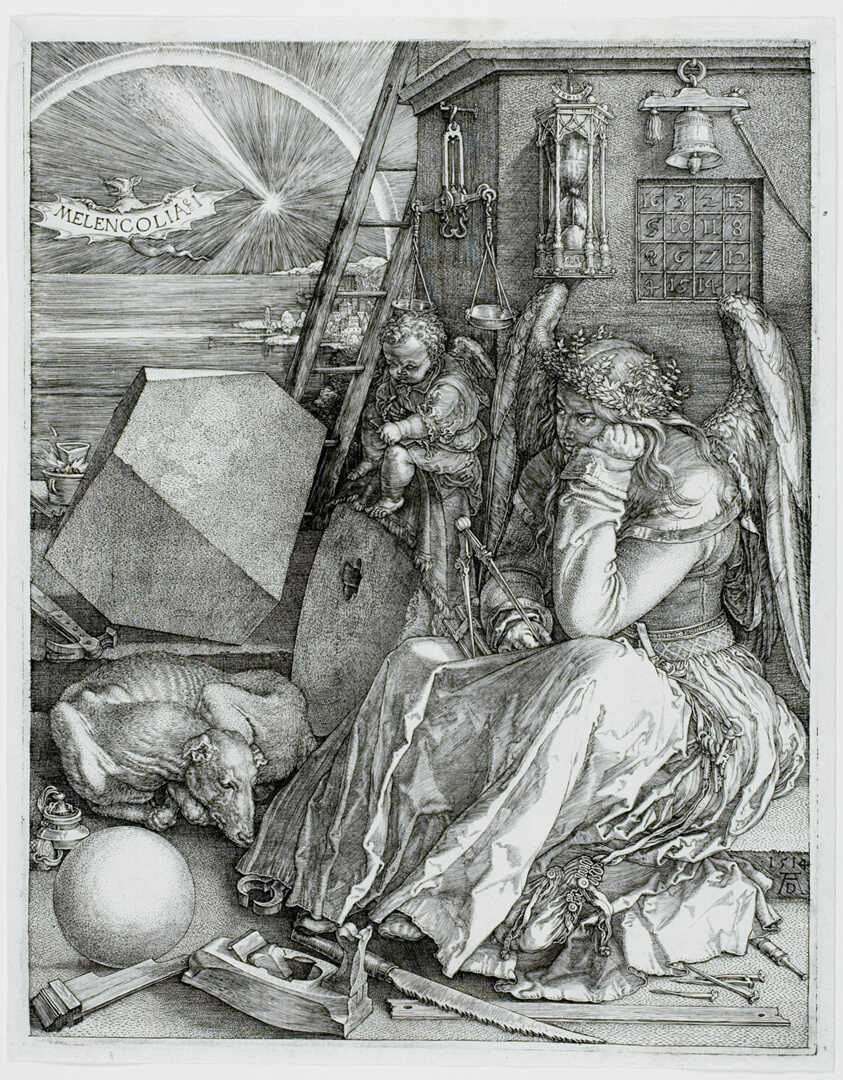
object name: Print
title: Melencolia I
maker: Albrecht Dürer (German, 1471-1528)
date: 1514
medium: Engraving in black on ivory laid paper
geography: Germany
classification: engraving; print; prints and drawing; paper